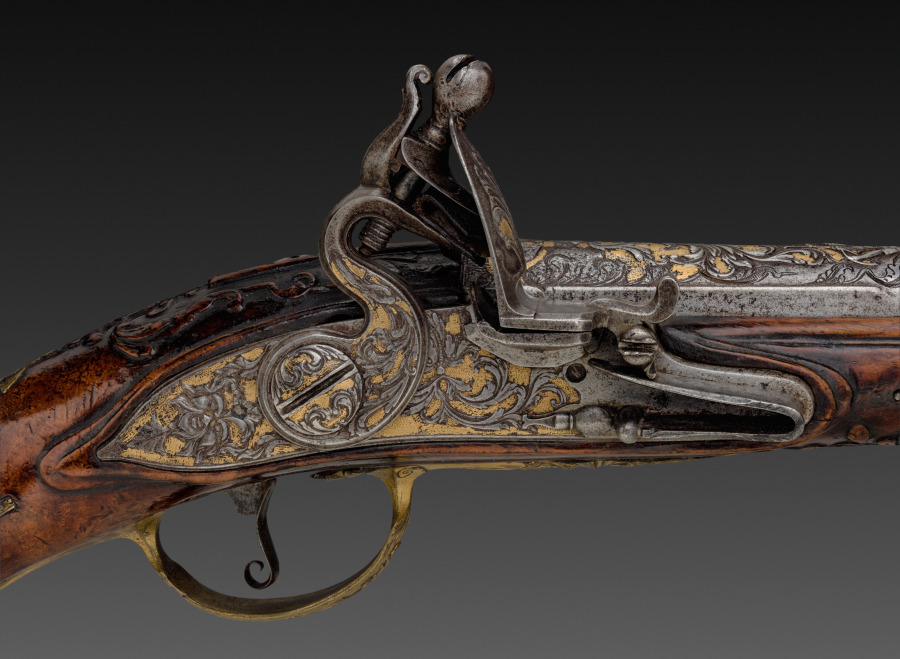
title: Flintlock Pistol (2 of 2)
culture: Franco-Flemish, Liège, early 18th Century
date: early 1700s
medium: steel with gold inlay, gilt-brass mounts; walnut burl stock; chiseled high-relief decoration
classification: Arms and Armor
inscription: on barrel: G. MASSIN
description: The barrel of this pistol is signed G. MASSIN, a gunsmith apparently working in eastern France or French-speaking Flanders, possibly the city of Liège. The exquisite ornament along the breech of the barrel is chiseled and engraved. The gilded lock-plate and mounts may be compared to the finest contemporary work in other media, such as furniture with ormolu mounts.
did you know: The flintlock ignition system was developed in the 1600s and remained the dominant system until the early 1800s.